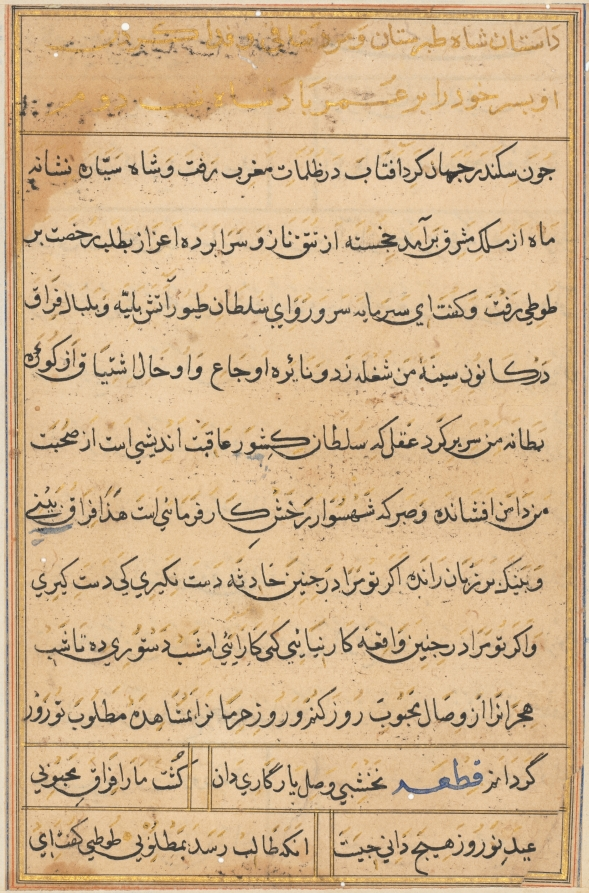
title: Page from Tales of a Parrot (Tuti-nama): text page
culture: Mughal India, court of Akbar (reigned 1556–1605)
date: c. 1560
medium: gum tempera, ink, and gold on paper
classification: Painting